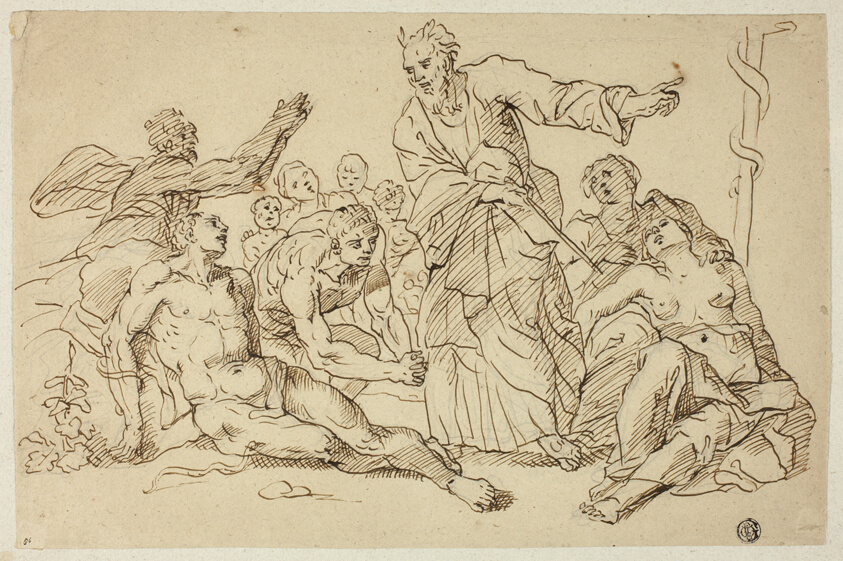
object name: Drawing and Watercolor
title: Moses and the Brazen Serpent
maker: Unknown Artist; Possibly Italian, n.d.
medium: Pen and brown ink, over graphite, on tan laid paper, tipped onto gray laid paper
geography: Italy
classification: pen and ink drawings; drawings (visual works); prints and drawing